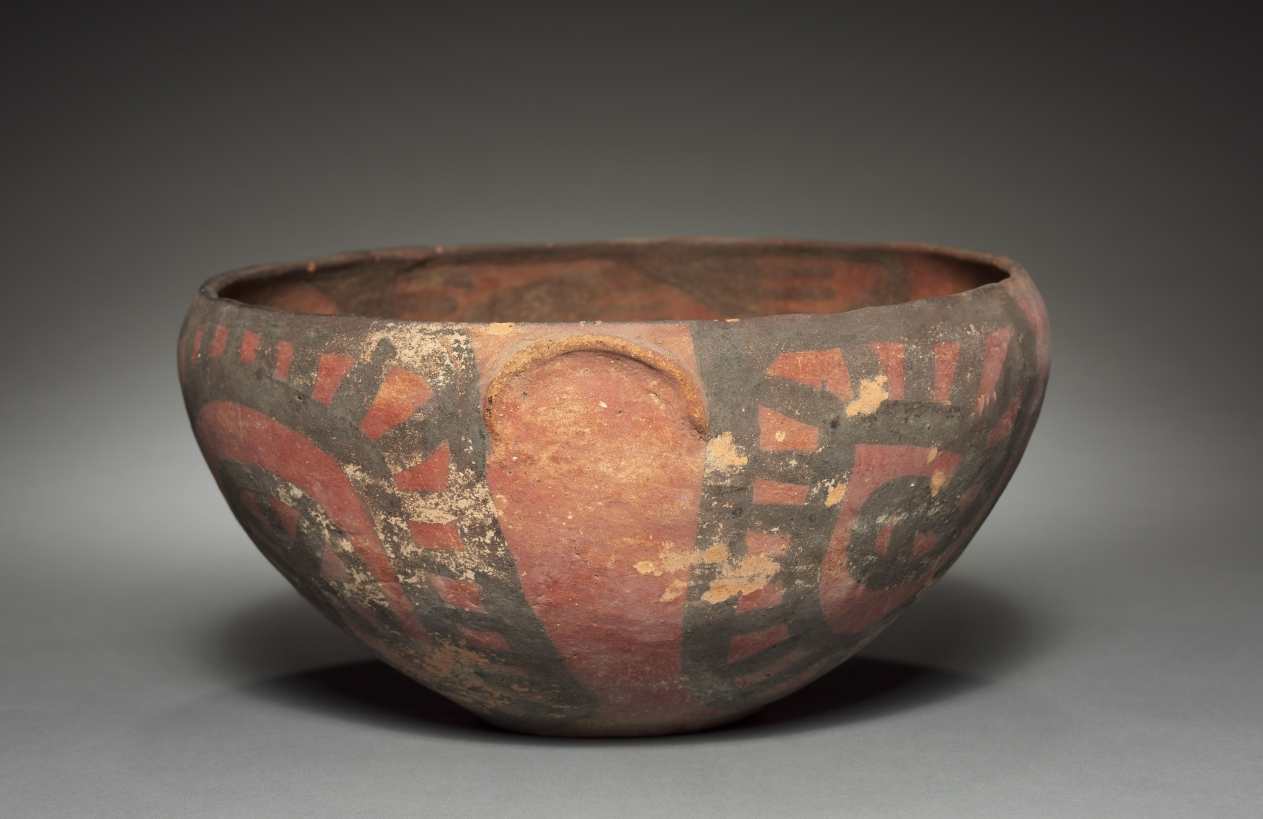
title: Two-Handled Bowl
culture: Argentina, Santamariana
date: 1000–1500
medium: earthenware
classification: Ceramic